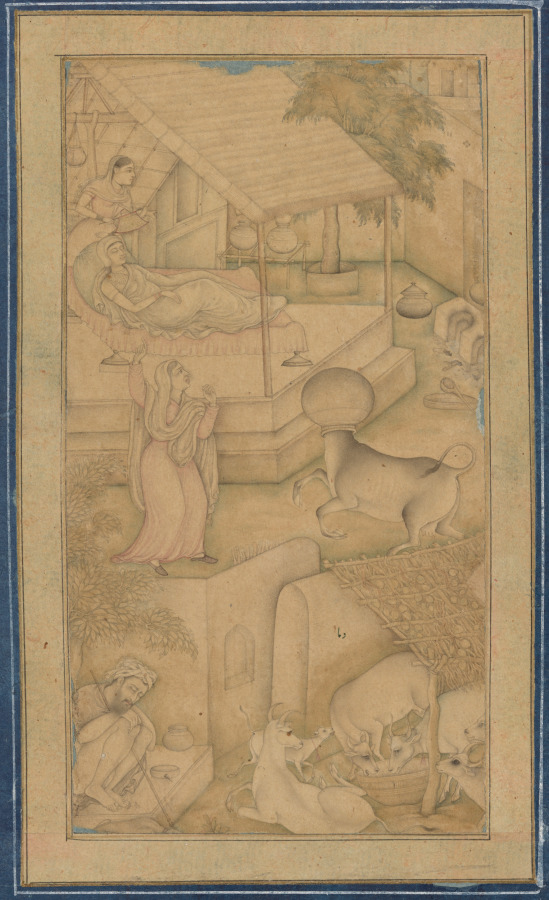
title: A woman mistakes a cow for the Angel of Death, from a Lights of Canopus (Anwar-i Suhaili) of Kashifi (Iranian, d. 1504)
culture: Mughal India, court of Jahangir (1605–1627)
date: c. 1610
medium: Gum tempera on paper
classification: Drawing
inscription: walida-i-rustam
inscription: Zal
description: In this gently colored, amply shaded painting, an ailing girl lies listless, eyes barely open, as an attendant fans her. A cow who got her head stuck in a pot has entered the yard in confusion. The girl’s mother, who had been weeping and praying to exchange her own life for the health of her daughter, thought the Angel of Death had come to take her. Pointing to heaven, the woman begs that her daughter be taken instead. Outside the gate, a wandering holy man dozes, indicating this scene takes place in the evening, and a calf annoys her mother as she eats.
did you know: A previous owner identified the scene as the first cesarean section.